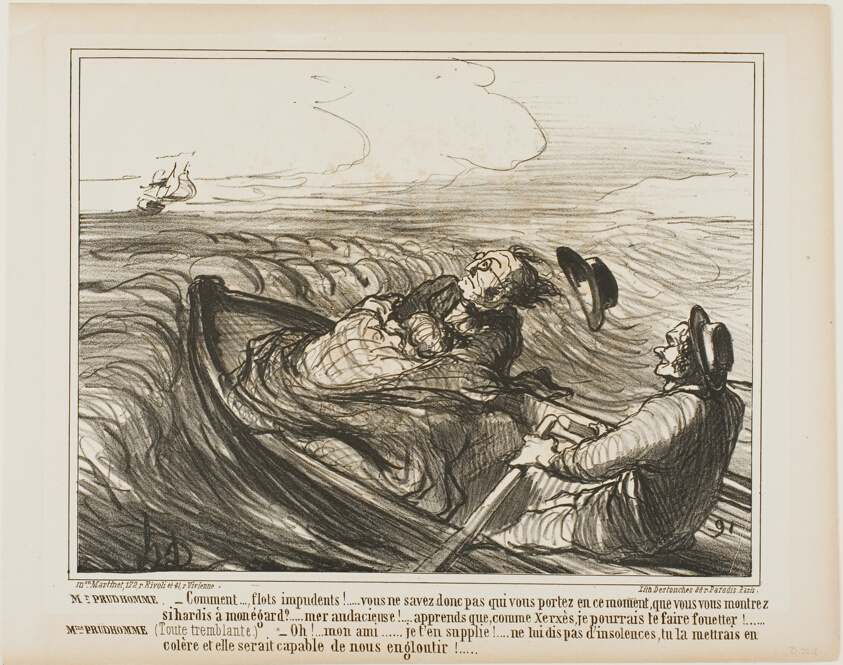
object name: Print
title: Mr. Prudhomme: “- Obnoxious waves.... don't you know whom you are carrying in this moment?... oh audacious... know I shall, like Xerxes, whip you terribly.” Mme Prudhomme: (shivering of fear) “- Pray, my dear friend, do not offend the sea any longer... you might wake its fury and it might devour us completely!,” plate 1 from Impressions nautiques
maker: Honoré Victorin Daumier; French, 1808-1879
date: 1859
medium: Lithograph in black on ivory wove paper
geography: France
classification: lithograph; print; prints and drawing